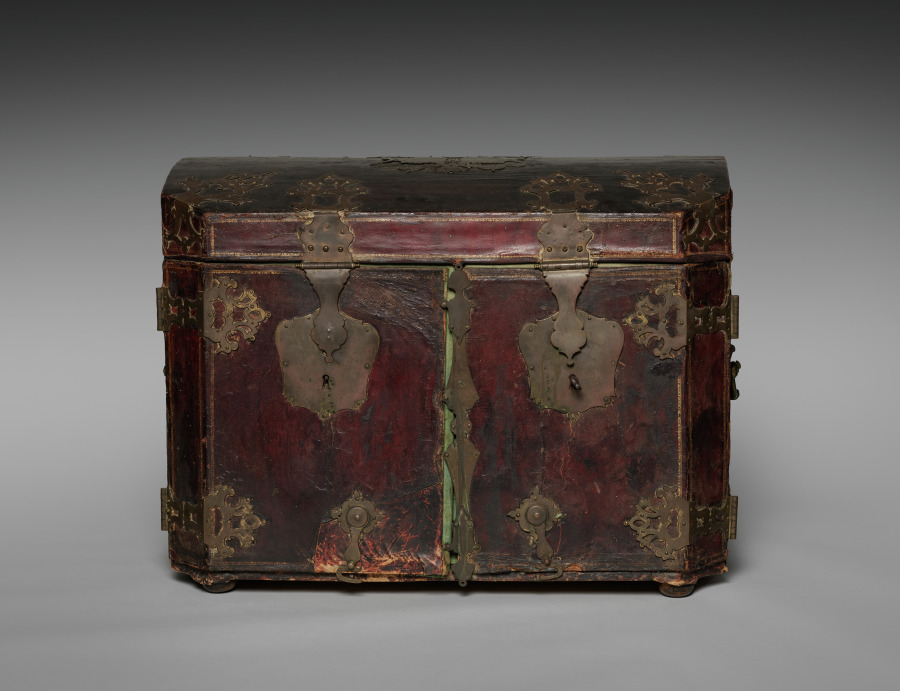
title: Chest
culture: Italy, Venice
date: 1700s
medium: leather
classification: Miscellaneous